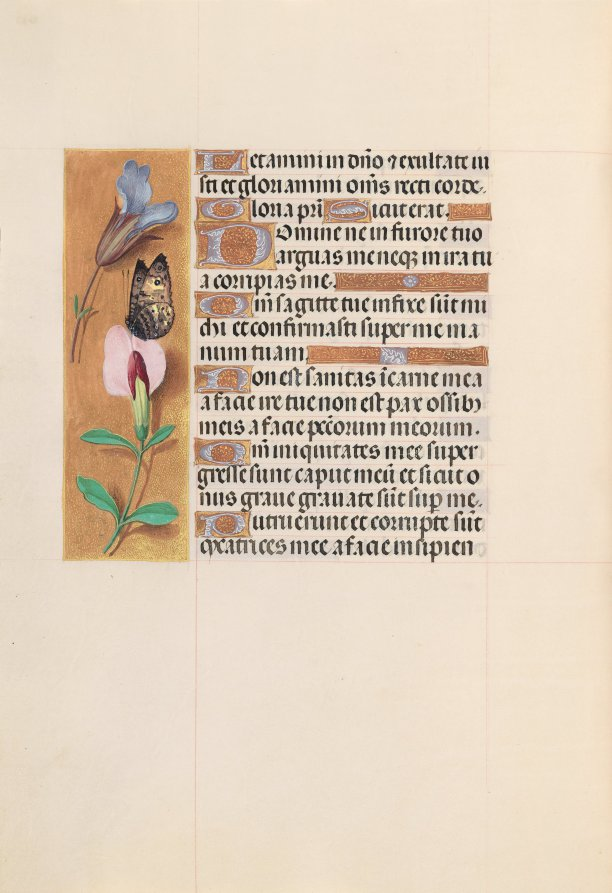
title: Hours of Queen Isabella the Catholic, Queen of Spain: Fol. 202v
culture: Flanders, Ghent and Bruges, late 15th century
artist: Master of the First Prayerbook of Maximillian (Flemish, c. 1444–1519)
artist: and Associates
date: c. 1500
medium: ink, tempera, and gold on vellum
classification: Bound Volume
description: This manuscript was illuminated by a circle of at least five highly organized manuscript painters active in the Flemish cities of Ghent and Bruges. The principal illuminator was Alexander Bening, who painted the majority of the book's miniatures. Manuscripts produced by this circle of artists are renowned for the decoration of their borders, which typically feature a rich variety of realistically-painted flowers, birds, and butterflies. This prayer book, called a book of hours, was intended not for a cleric, but for the private devotions of a lay person-in this case, Isabella the Catholic, Queen of Spain (1451-1504). Isabella's coat of arms embellishes the book's frontispiece. It is unlikely that the book was commissioned by the Queen herself; rather, she probably received it as a diplomatic gift from someone courting her patronage, perhaps Cardinal Francisco Jimenez de Cisneros. A Franciscan friar, Jimenez was dependent upon Isabella for his advancement, first to the post of Queen's confessor in 1492, and then to Archbishop of Toledo in 1495.